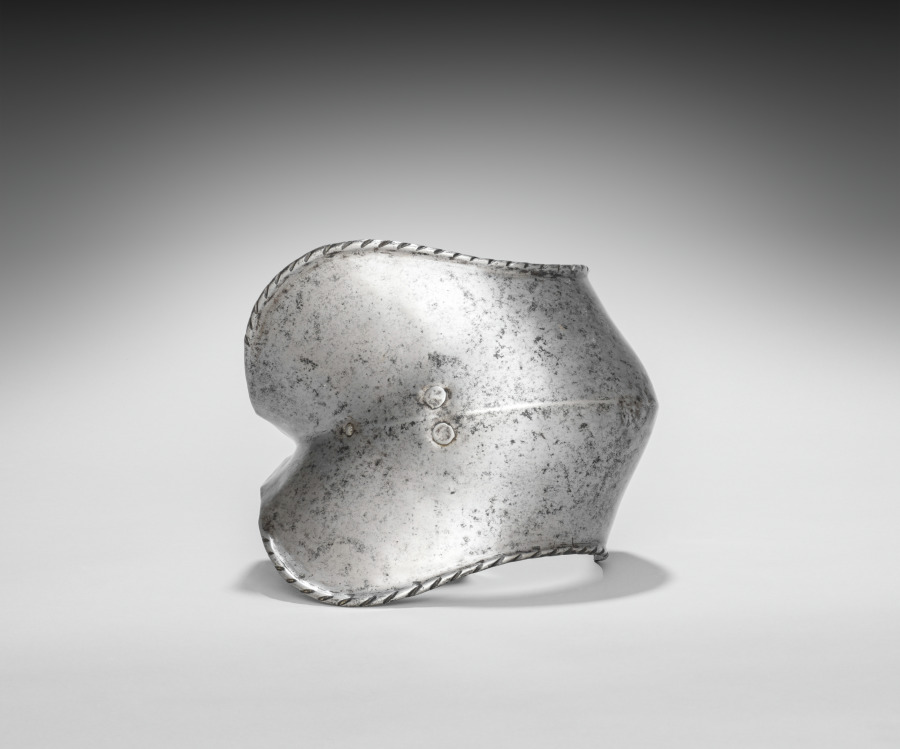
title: Elbow Cop (left)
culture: Germany and Spain, 16th century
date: c. 1560–1580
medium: steel, leather straps, brass rivets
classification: Arms and Armor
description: This armor was developed for the joust-a sporting combat between two mounted contestants. Although all of the elements of this armor date from the same period, they are not all from the same suit. This armor is thus called "composed." It also shows the asymmetry of jousting armor. The participants rode along a wall-like barrier known as a "tilt" with their left sides facing one another. Consequently, armor on that side of the body had to be thicker. Note the large plate (grandguard) over the left shoulder for extra protection. Also, the breathing holes in the helmet were placed on the right side (farthest from an opponent's lance) to avoid injuries from splinters. The bracket attached to the right breastplate is called the lance-rest, a shock-absorbing support designed to accommodate the lance when "couched" under the right armpit.